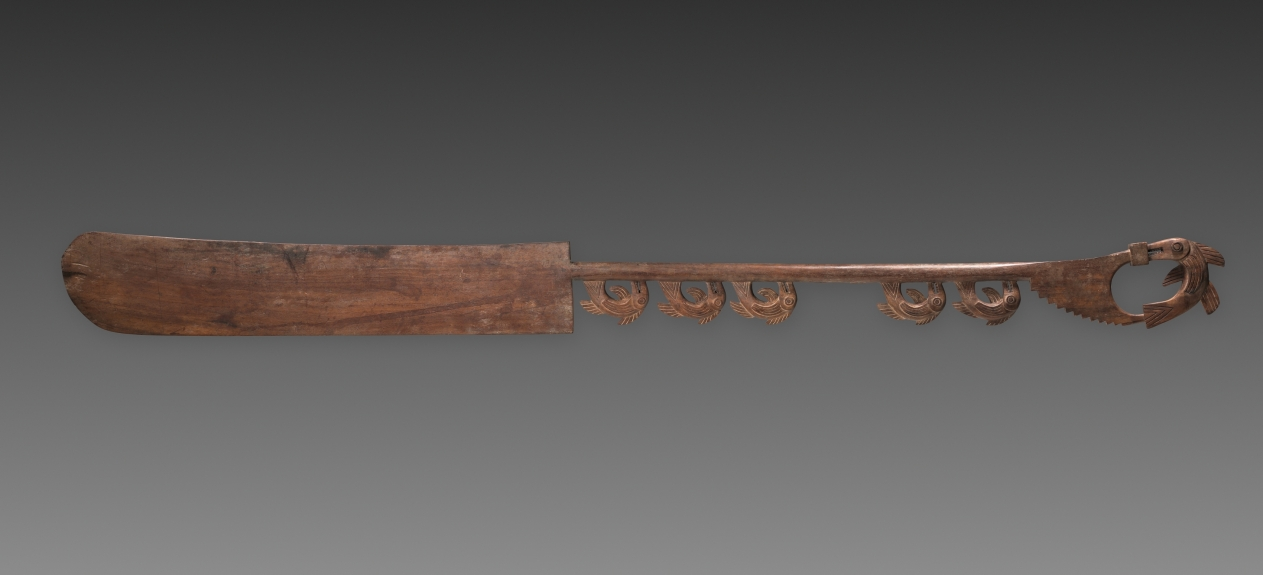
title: Carved Board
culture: Peru, South Coast, Ica Valley, 15th-16th century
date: 1400s-1500s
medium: wood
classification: Sculpture